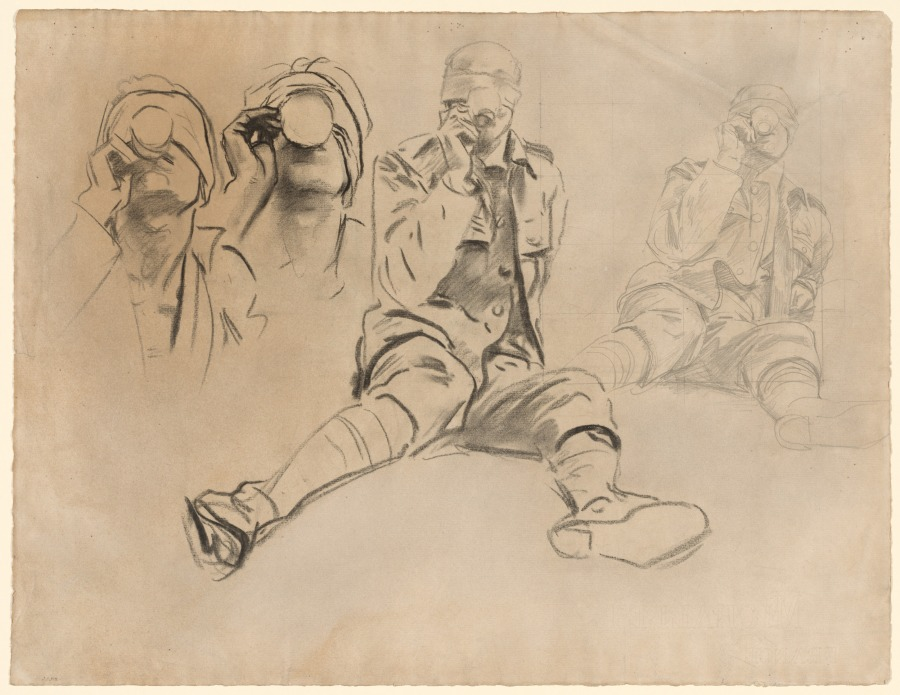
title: Studies of a Soldier Drinking, for Gassed (recto); Studies of a Male Nude (verso)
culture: America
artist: John Singer Sargent (American, born Italy, 1856–1925)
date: 1918–19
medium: charcoal (stumped in places) (left figures) and graphite (right figure); squared in graphite (right figure)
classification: Drawing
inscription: recto: signed?, lower left, in graphite: JS.312.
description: In 1919, Sargent exhibited a large painting at the Royal Academy of Art in London called Gassed. The Dressing Station at Le Bac and on the Doullers-Arras Road. The British War Memorial Committee had commissioned the work from him as a way of honoring the sacrifices of World War I. The subject was based on a scene the artist actually witnessed during his visit to battlefields in France in 1918. This drawing is a study for one of the soldiers in the painting, which now hangs in the Imperial War Museum in London.